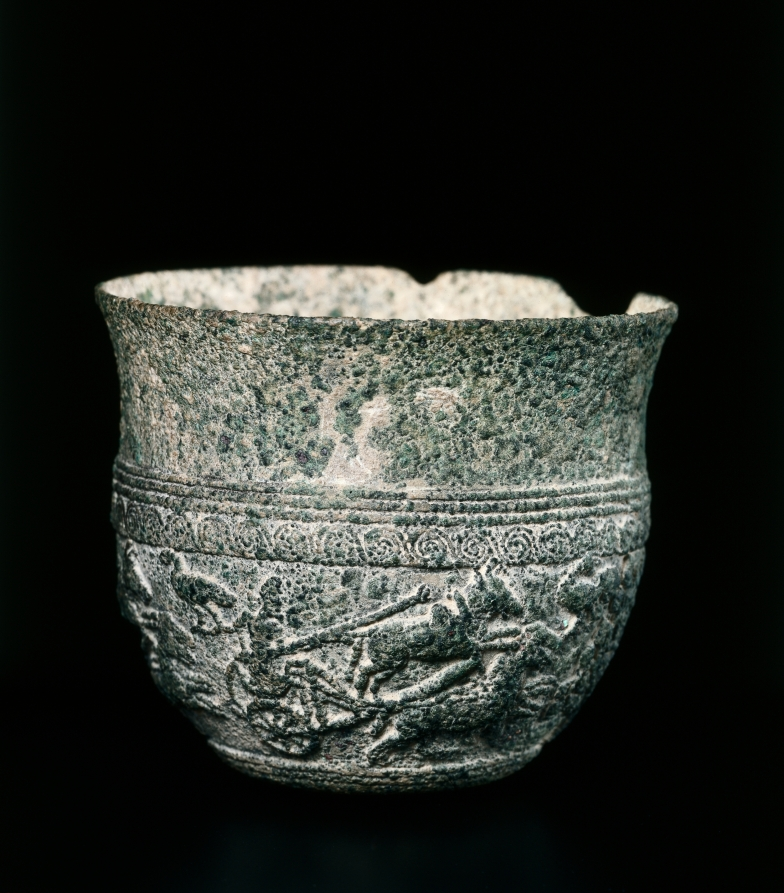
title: Libation Cup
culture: India, Maurya period (322–185 BCE)–Shunga period (185–78 BCE)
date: c. 235–185 BCE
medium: bronze, lost wax technique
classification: Metalwork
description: The remarkably clear, tiny carvings in an uninterrupted frieze around the lower section include one sacred palm tree and one fig tree (ficus religiosa) that divide the space into two main scenes. One features female musicians, the other has two chariots, each drawn by a pair of galloping horses. Bulls, birds, and flowers fill the background spaces. This cup is from a group found in an area with close links to Indo-Greek kingdoms, and the chariots and framing motifs reveal knowledge of Hellenistic art.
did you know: The tree carved into the cup is of the same species as the Bodhi tree, under which the Buddha reached enlightenment.